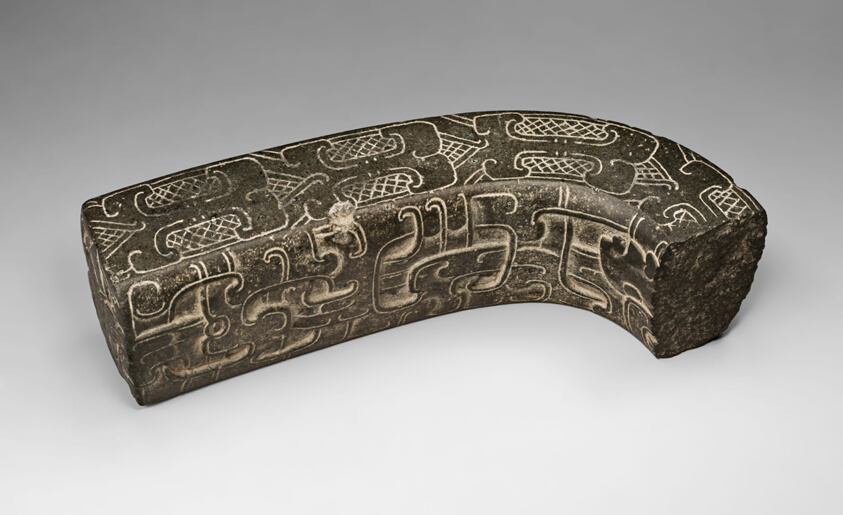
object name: Sculpture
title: Fragment of a Ceremonial Ballgame Yoke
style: totonac, tajin, classic veracruz, mesoamerican, Pre-Columbian, americas, Arts of the Americas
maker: Totonac; El Tajín and vicinity, northern Veracruz, Mexico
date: 700–800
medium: Stone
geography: El Tajín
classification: ceremonial object; stone; sculpture; art of the americas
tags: sports, scrolls (motifs), ceremony, ritual, games, abstract figures, faces, supernatural